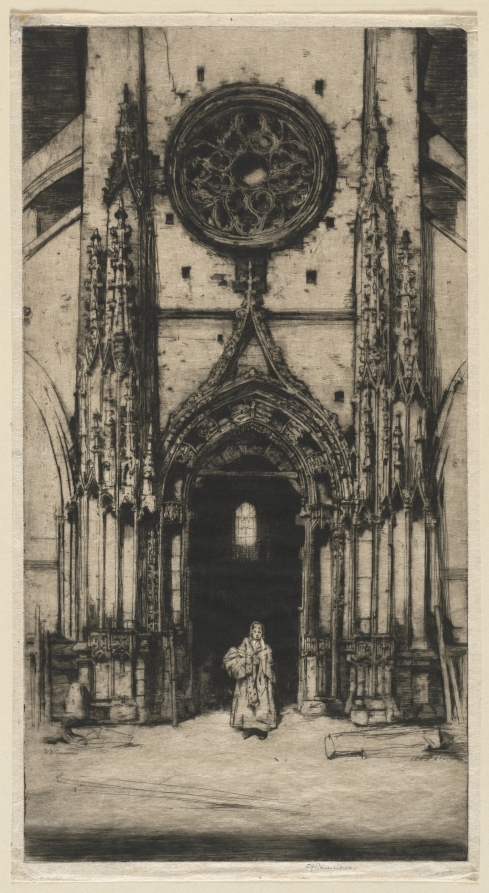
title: Old St. Etienne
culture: England, 20th century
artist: David Young Cameron (British, 1865–1945)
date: 1907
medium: etching and drypoint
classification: Print